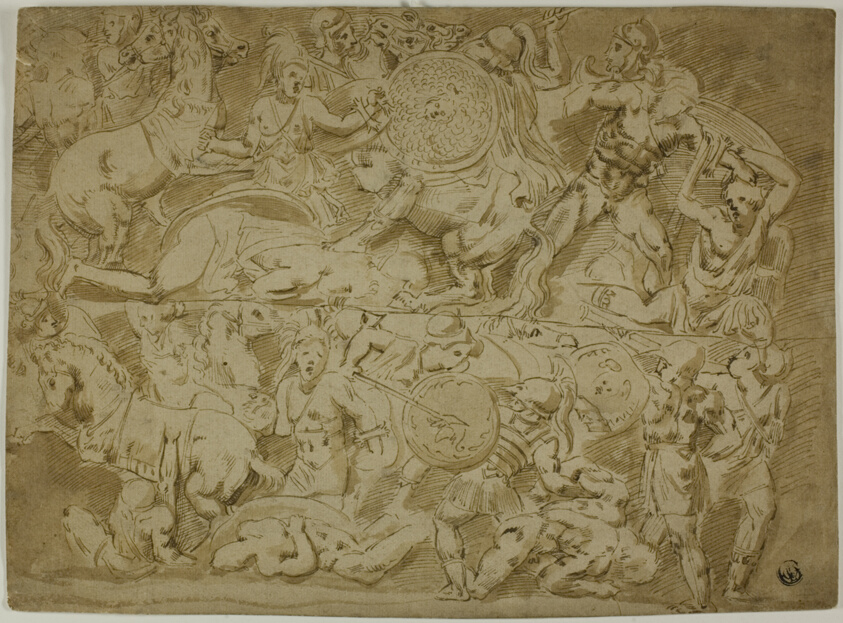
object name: Drawing and Watercolor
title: Battle of Amazons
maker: Lodovico Carracci,; Italian, 1555-1619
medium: Pen and brown ink, with brush and brown wash, on tan laid paper, laid down on brown wove paper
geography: Italy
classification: ink or chalk wash; drawings (visual works); prints and drawing